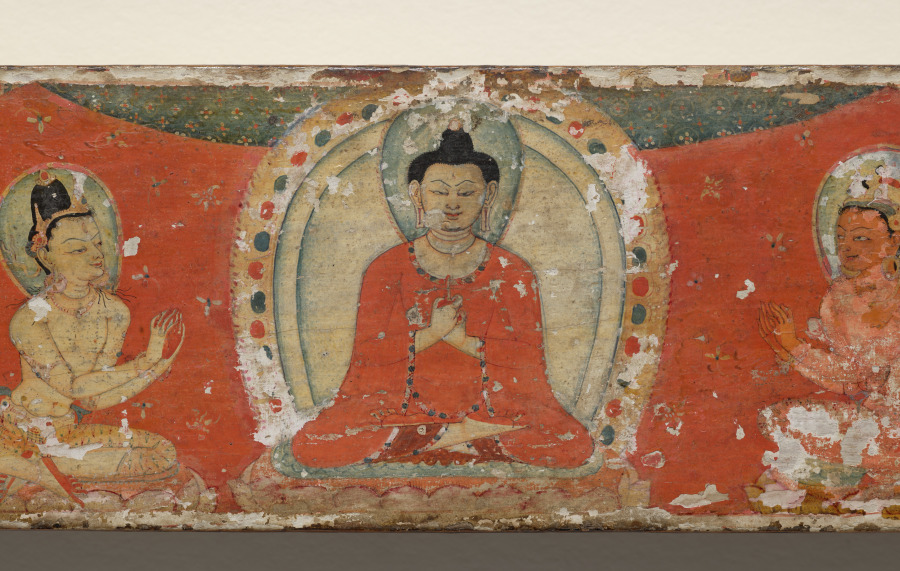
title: Ratnasambhava, Akshobhya, Vairochana with attendants, Amitabha, and Amoghasiddhi, Top cover, from a Manuscript of the Perfection of Wisdom in Eight Thousand Lines (Ashtasahasrika Prajnaparamita-sutra)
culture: Eastern India, Bihar, Vikramashila Monastery. Paintings: Nepal, Kathmandu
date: Sunday, September 14, 1119 (year 239 of the Newar Samvat in the month of Ashvina)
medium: Covers: Gum tempera, colors, and paper on wood; pages: gum tempera and ink on palm leaves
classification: Painting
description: The inner side of the top cover is fully painted with images of the Five Cosmic Buddhas of Esoteric Buddhism. Each one has a different color, meaningful hand gesture, and is associated with a spatial direction. In the center is the white Vairochana holding his hands in the enlightenment mudra. On either side of the binding holes are the other four Cosmic Buddhas Akshobyha (blue, earth-touching mudra, east) and Amitabha (red, meditation mudra, west), and on the ends are Ratnasambhava (gold, gift-giving mudra, south) and Amoghasiddhi (green, fear-not mudra, north). The top side is covered with ritual materials indicating that this book was once an object of worship.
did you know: The Five Tathagatas could be the source of visions that would help Buddhist practitioners on the path to enlightenment.